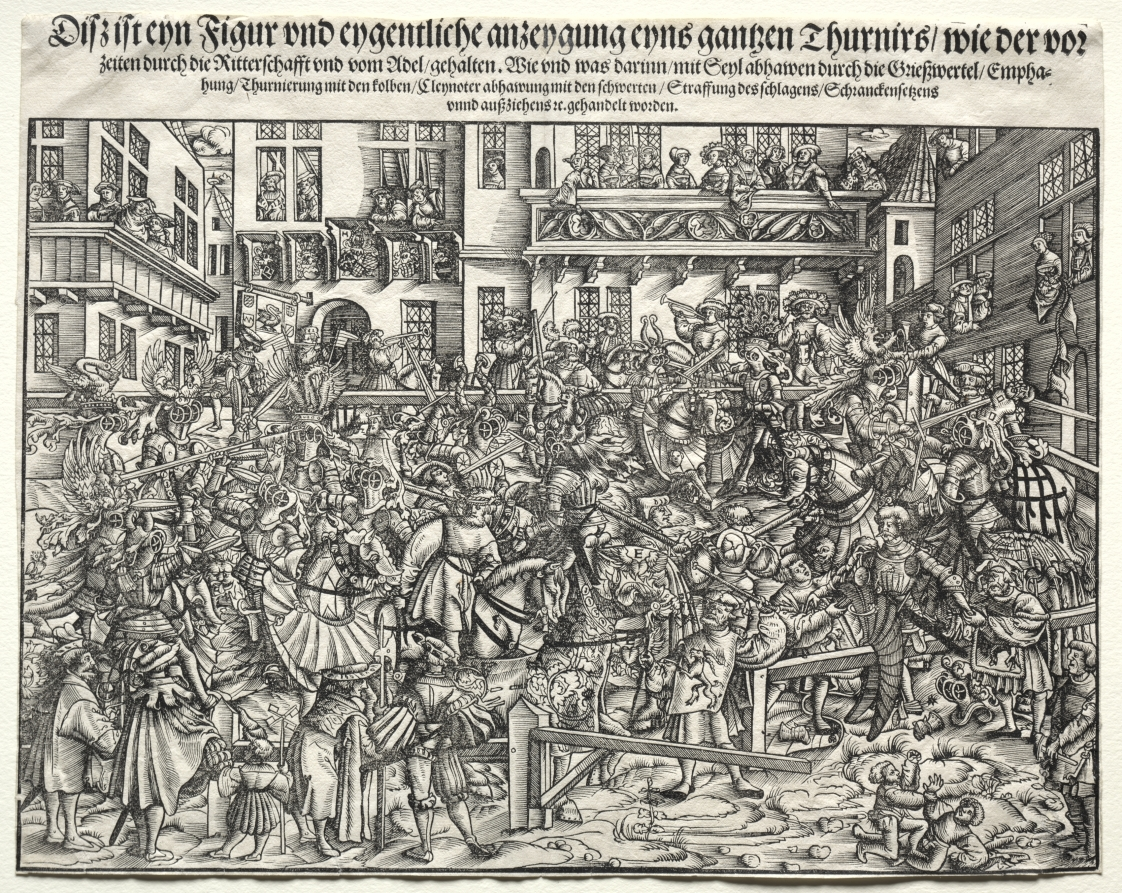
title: A Tournament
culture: Germany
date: 1500s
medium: woodcut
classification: Print